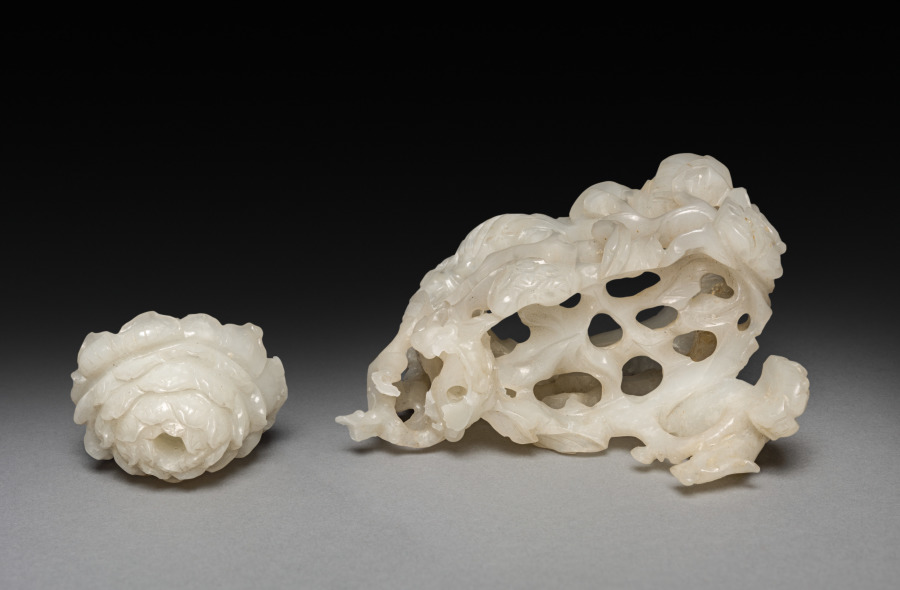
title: Three-Sectional Altar Group: Cylindrical Carving with Phoenix (base)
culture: China, Qing dynasty (1644-1911)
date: 1644–1911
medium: jade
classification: Jade